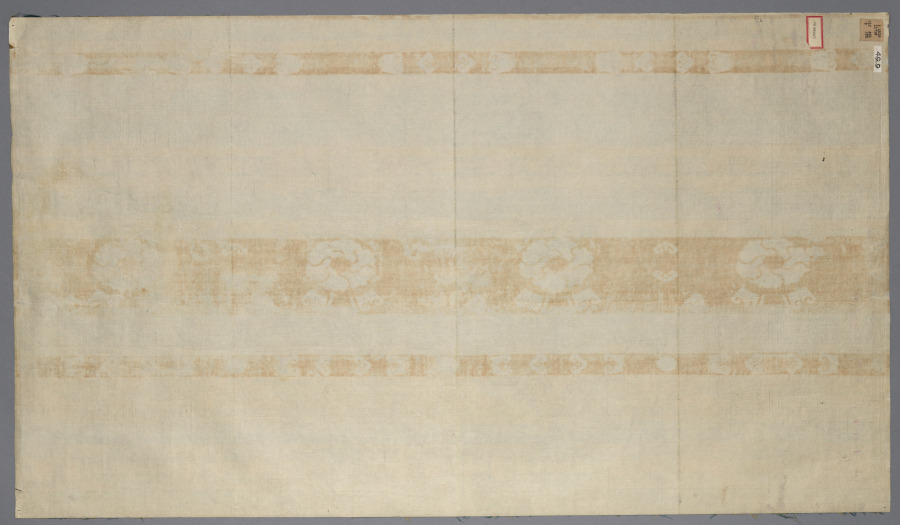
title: Fragment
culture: China, Ming dynasty (1368–1644)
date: 1368–1644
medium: Silk; compound twill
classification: Textile